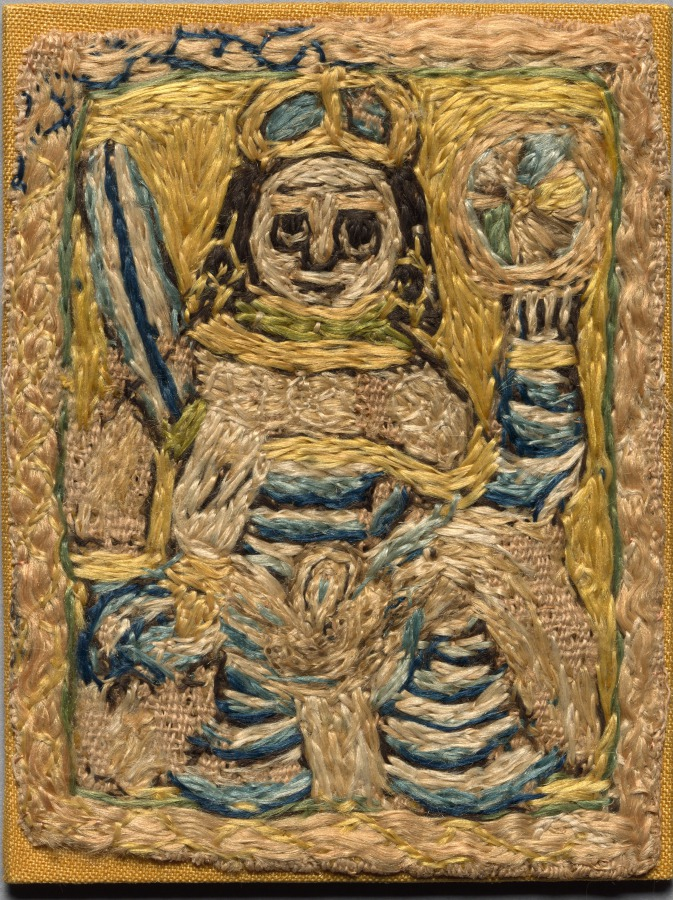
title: Fragment of a Clavus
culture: Egypt, Abbasid period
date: late 700s - early 800s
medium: embroidery on tabby weave: silk and linen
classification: Embroidery